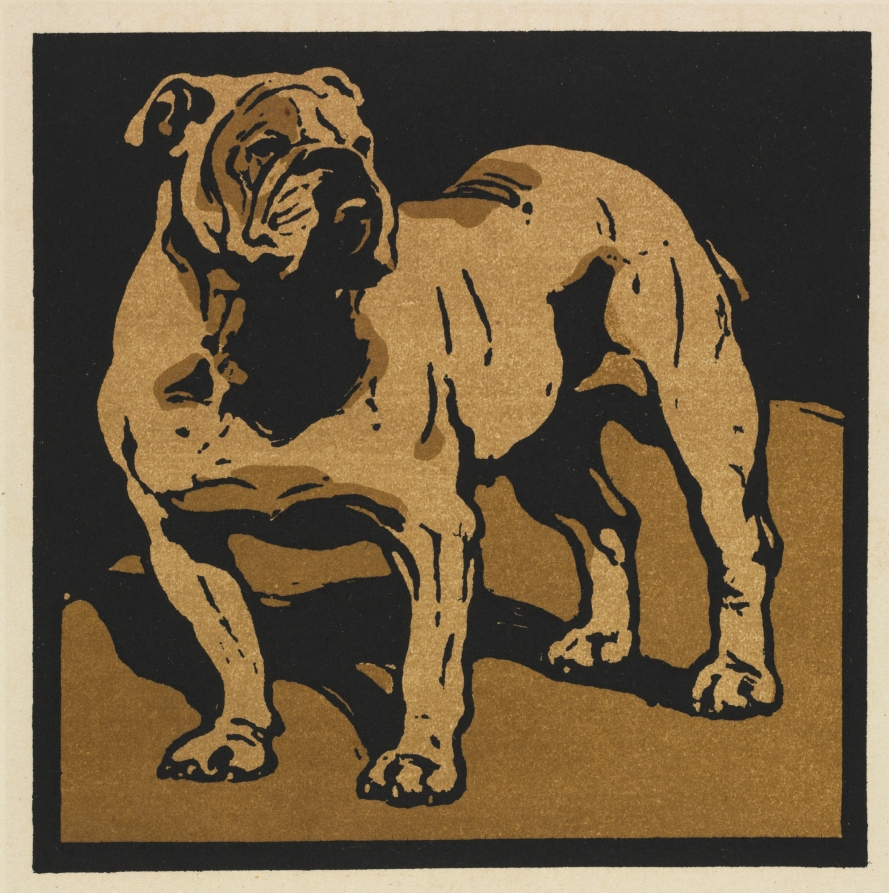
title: The Square Book of Animals: The British Bull-Dog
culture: England, 19th century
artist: William Nicholson (British, 1872–1949)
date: 1899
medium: color lithograph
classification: Print